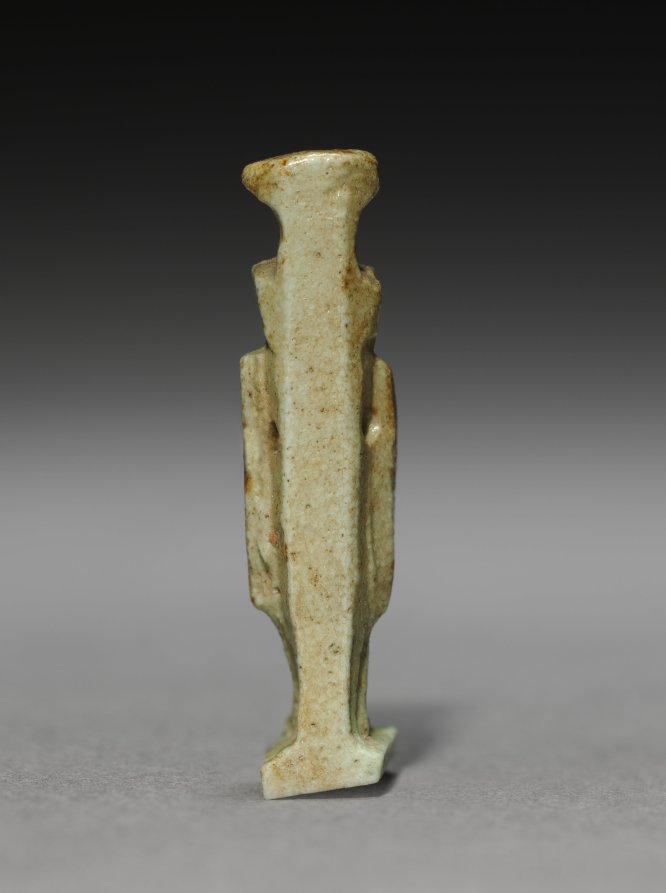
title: Amulet of Nephthys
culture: Egypt, Late period (715–332 BCE), Dynasty 30–Greco-Roman period (332 BCE–395 CE), Ptolemaic dynasty (305–30 BCE)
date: 380–30 BCE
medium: gray green faience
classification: Amulets